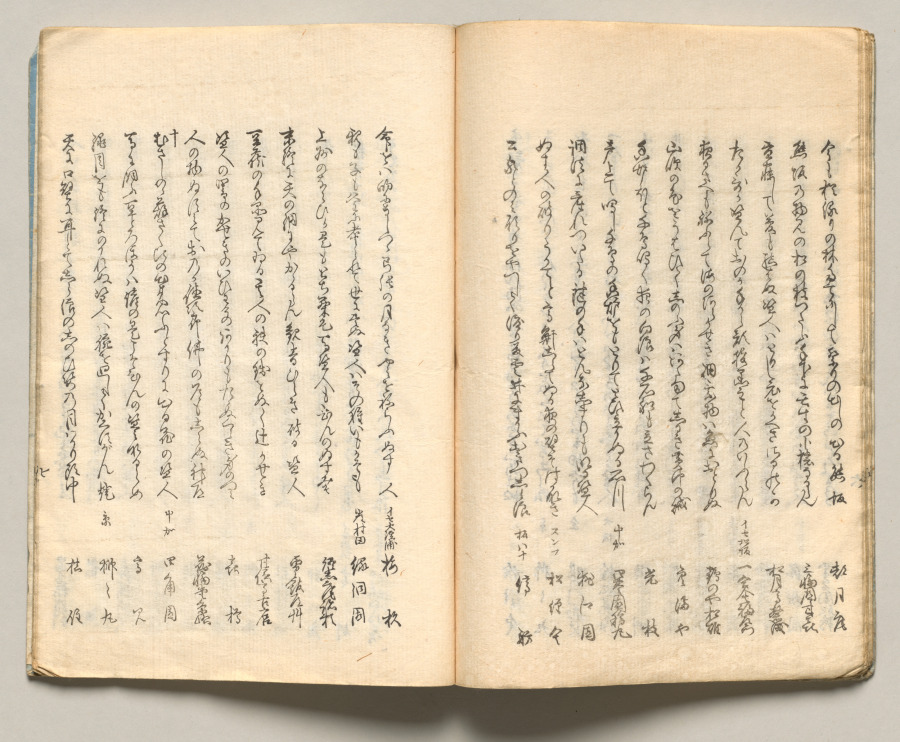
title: Spread Fourteen from Volume Six of People of Japan in Light Verse (Kyōka)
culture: Japan, Edo period (1615–1868)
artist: Utagawa Hiroshige (Japanese, 1797–1858)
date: 1857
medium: Woodblock-printed book; ink and color on paper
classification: Bound Volume